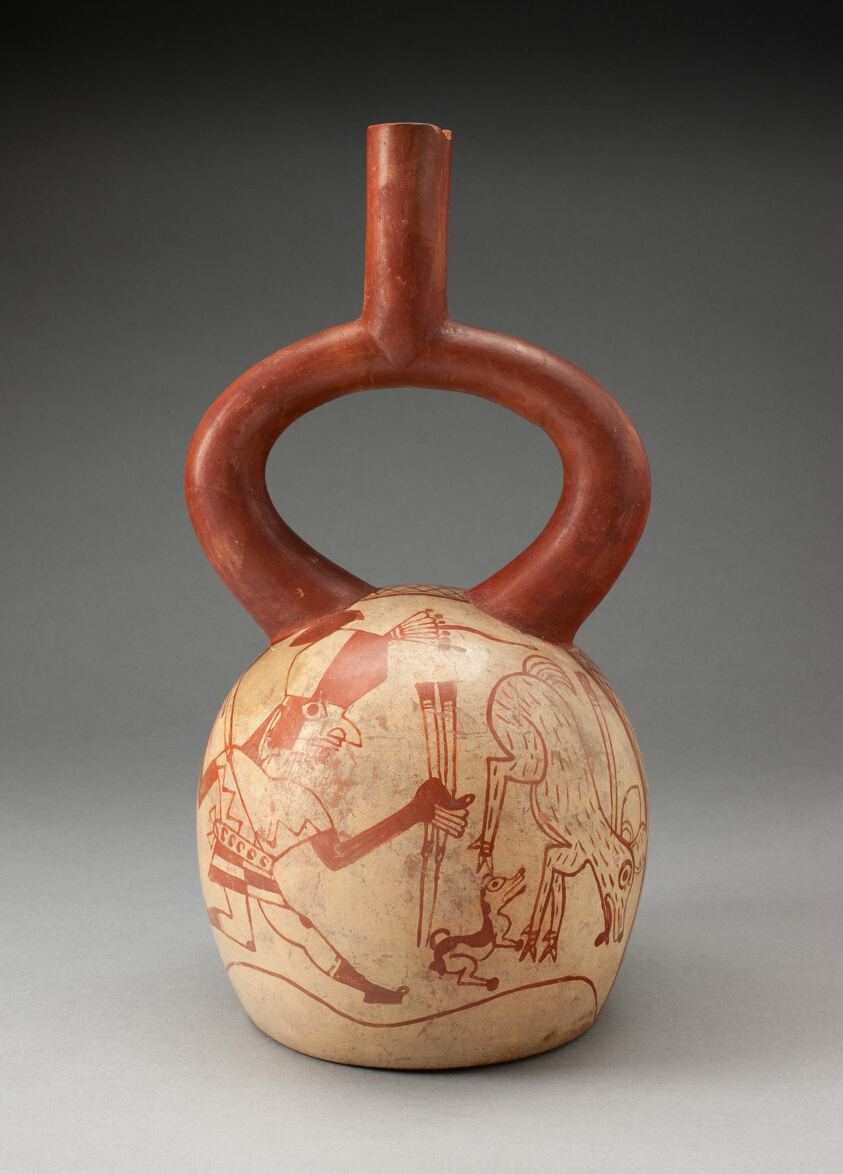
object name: Vessel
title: Stirrup Spout Vessel with Fineline Deer Hunt Motifs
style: moche, south american, andes, Arts of the Americas, andean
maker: Moche (North coast, Peru)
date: 100 BCE–500 CE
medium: Ceramic and pigment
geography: Peruvian North Coast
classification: earthenware; ceramics; vessel; art of the americas